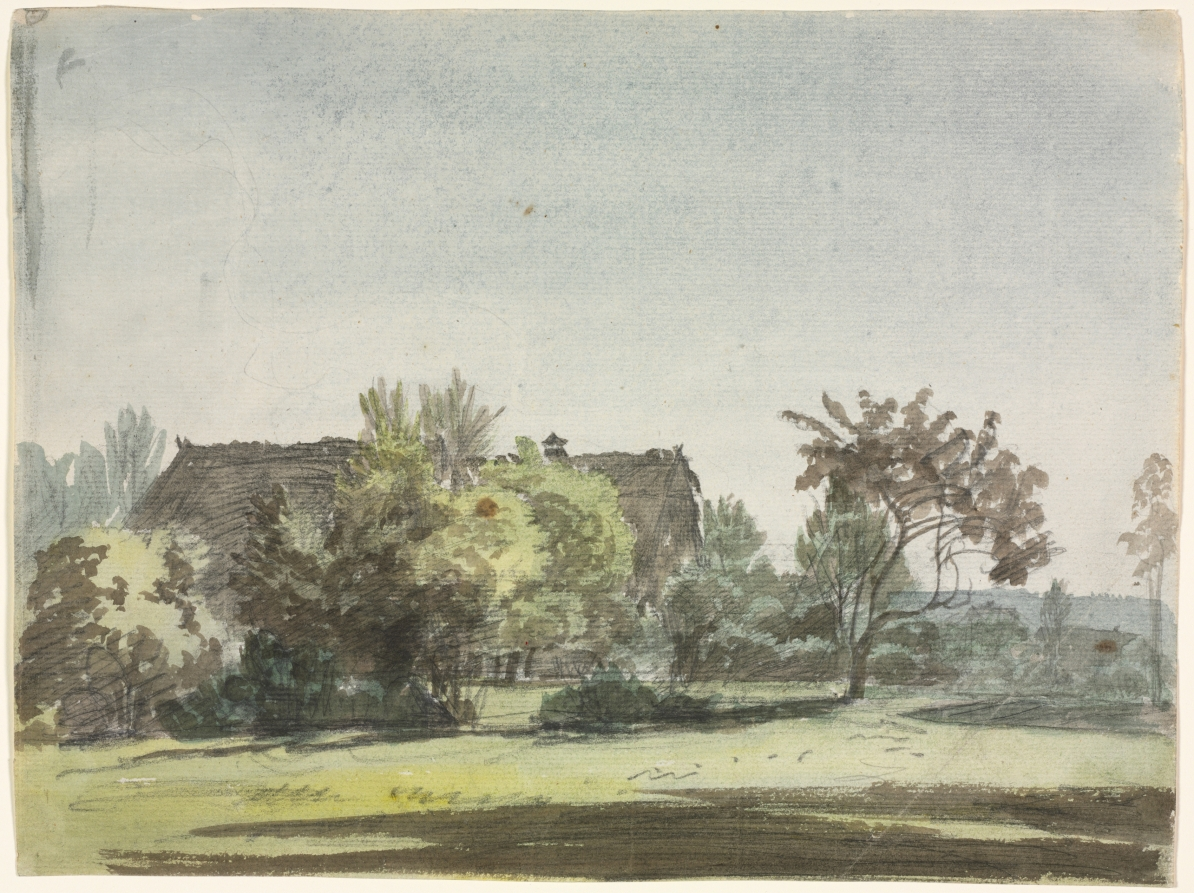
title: Farmhouse behind Trees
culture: Germany, 18th century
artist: Christoph Nathe (German, 1753–1806)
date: c. 1790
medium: watercolor and graphite on antique laid paper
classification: Drawing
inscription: Verso: collector's stamp, in light brown ink: "Dr. Apelt / Zittau enclosed in a double square [not in Lugt]" in graphite: "3 / Chr Nathe"